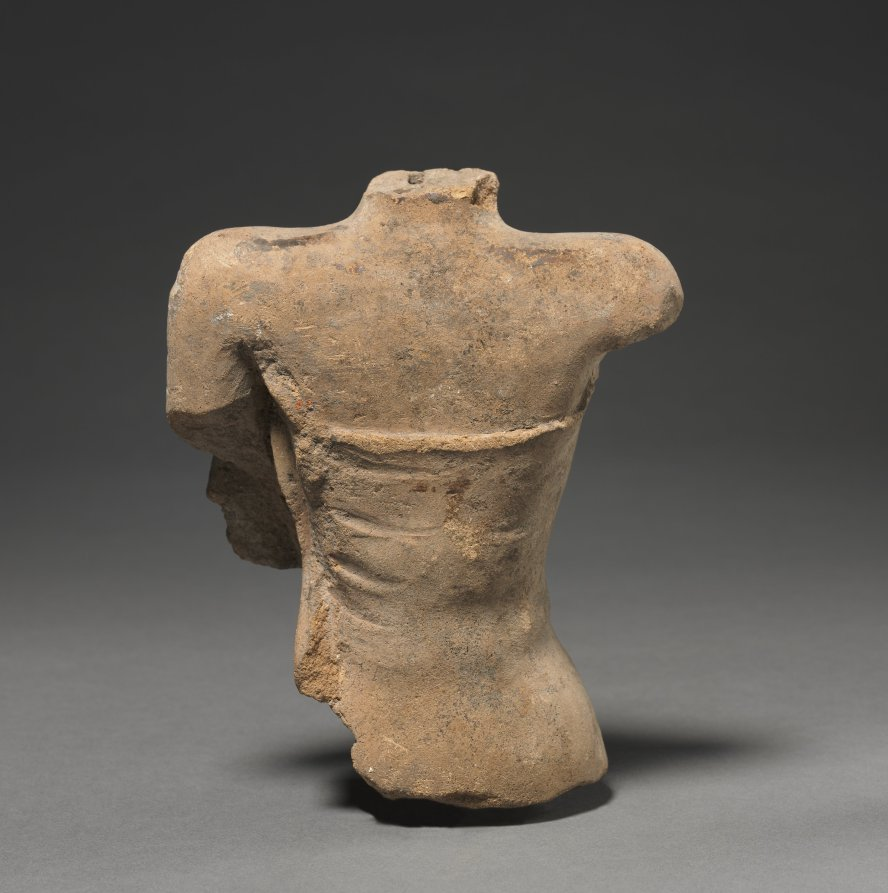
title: Female Torso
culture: Eastern Java, Majapahit Dynasty (1293-1478)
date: Majapahit Dynasty (1293–1478)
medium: terracotta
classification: Sculpture